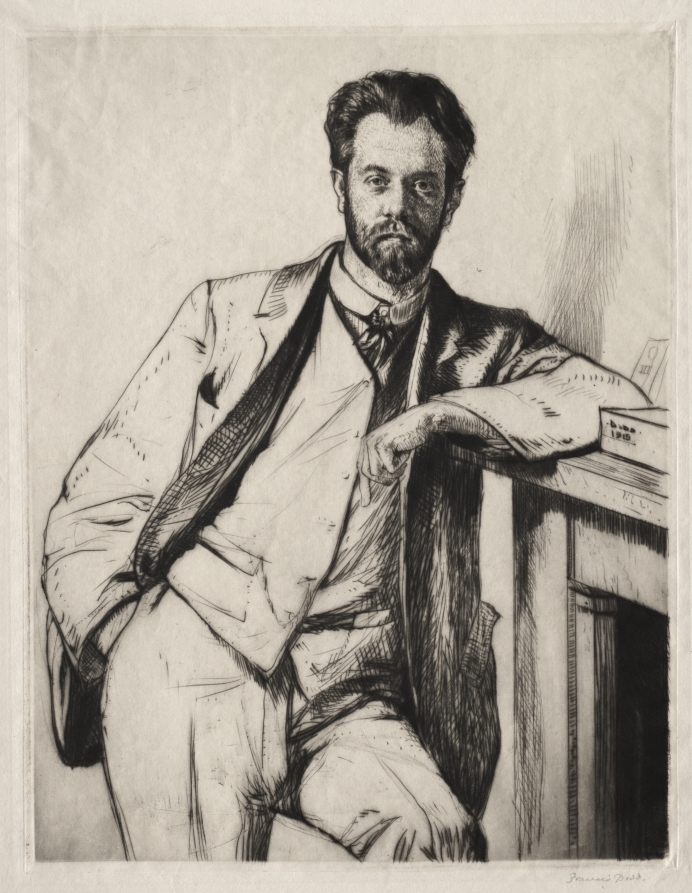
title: Charles Holden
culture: England, 20th century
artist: Francis Dodd (British, 1874–1949)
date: 1915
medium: drypoint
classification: Print